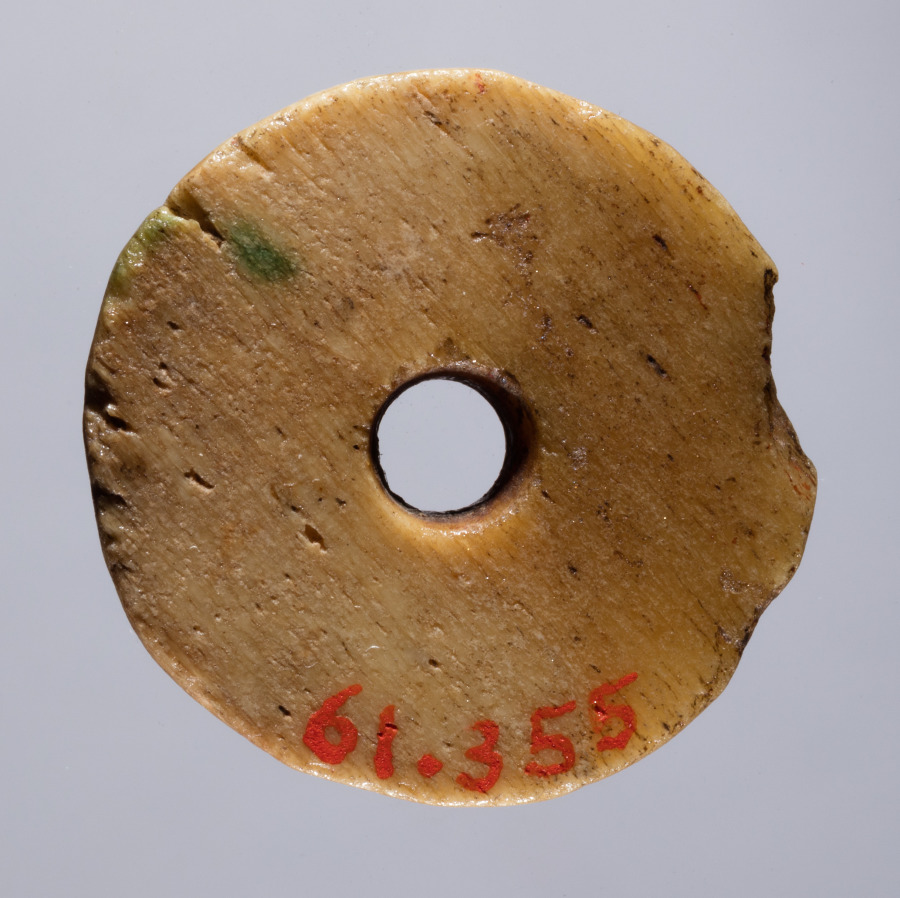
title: Spindle Whorl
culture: Iran, early Islamic period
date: 700s - 900s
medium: bone, incised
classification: Spindle Whorl